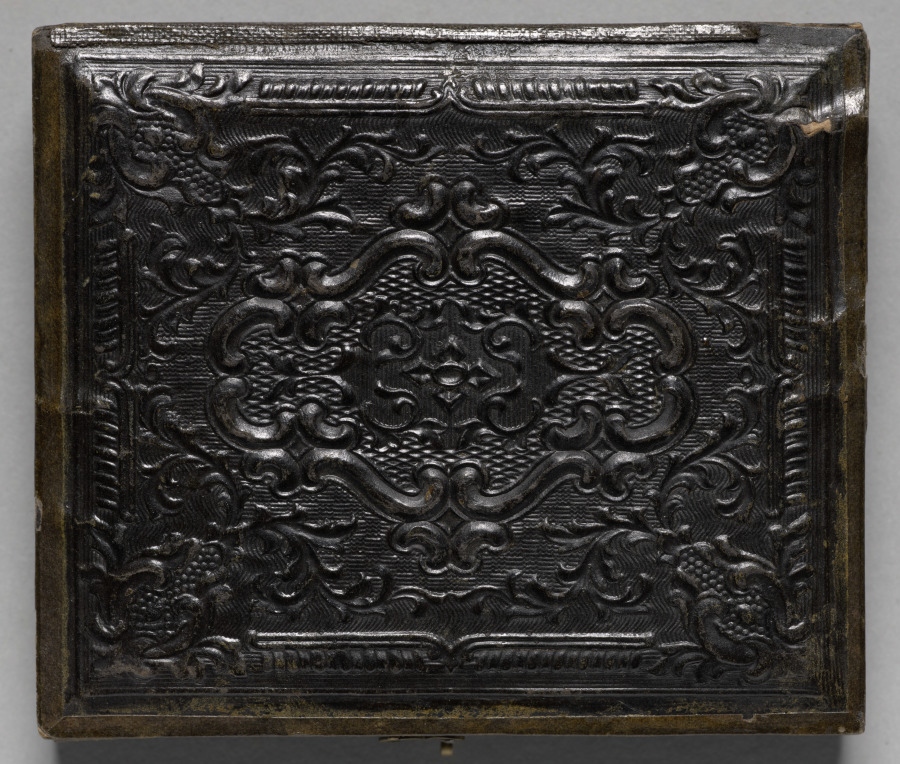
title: High Rock Tower and Stone Cottage, Lynn, Massachusetts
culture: America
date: c. 1862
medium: ambrotype, sixth plate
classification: Photograph